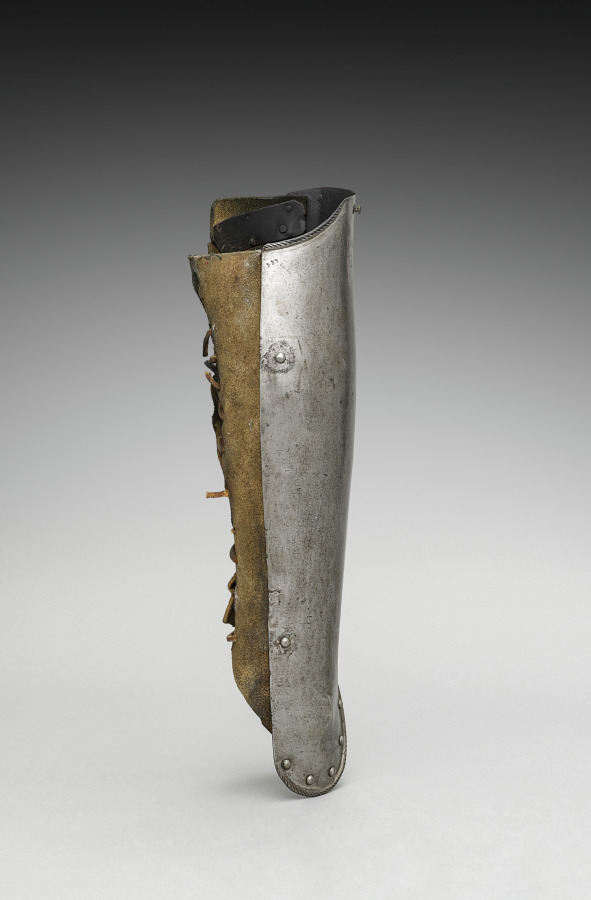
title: Right Greave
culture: Germany, 19th century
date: 1801–1900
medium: steel with black paint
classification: Arms and Armor